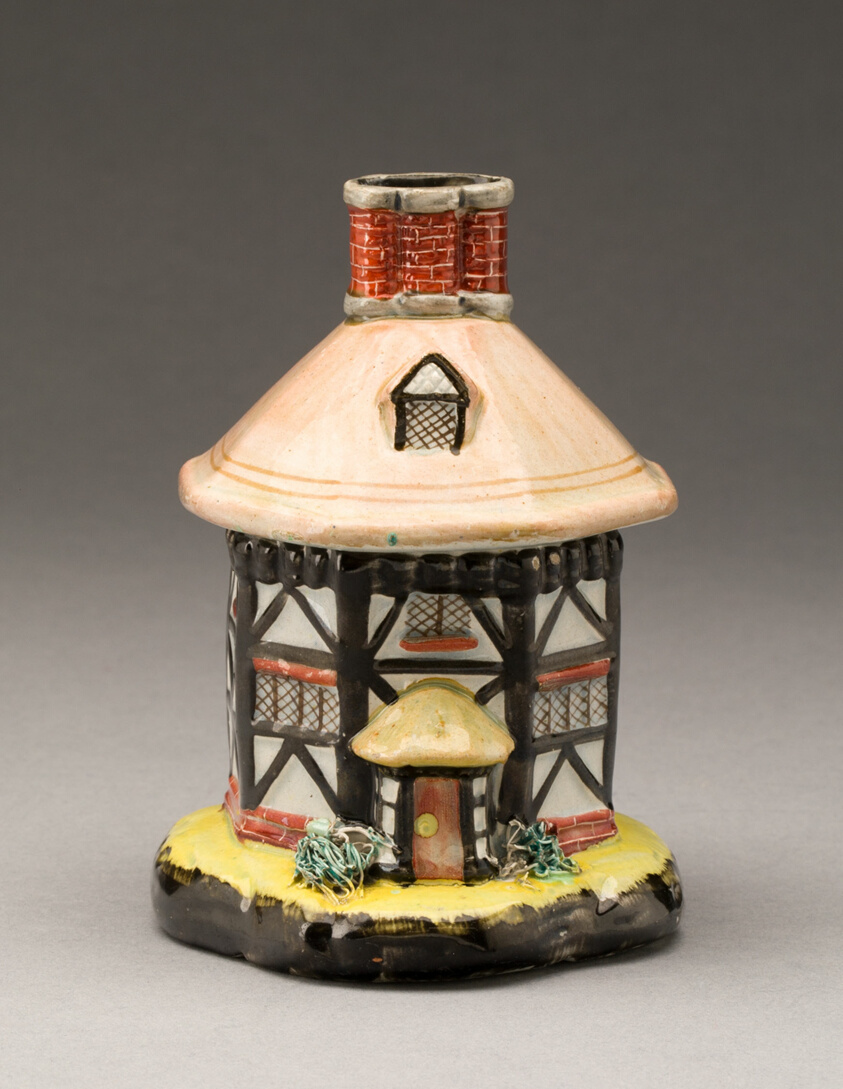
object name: Ceramics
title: Incense Burner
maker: England, Staffordshire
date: c. 1830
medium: Glazed earthenware with polychrome enamel decoration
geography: Staffordshire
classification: ceramics; european decorative arts